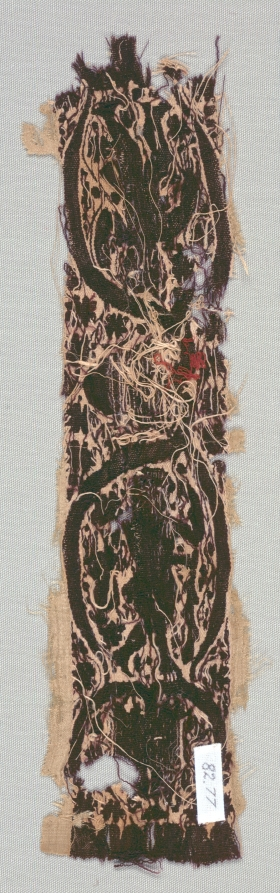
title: Rare Silk Tunic Fragment with Ornamental Sleeve Band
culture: Egypt, Byzantine period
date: 400s-500s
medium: plain weave: silk; tapestry weave with supplementary weft wrapping; undyed linen, dyed wool, silk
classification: Textile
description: This is the only known remnant of a silk tunic among thousands of tapestry-woven decorations that have survived in the dry Egyptian climate. Expensive imported silk, instead of indigenous linen or wool, formed the entire luxurious ground of the tunic, visible along the sides of the fragment. Shiny silk thread also formed some of the details, along with thicker linen thread, on the unusually brilliant purple wool ground. Two males wearing a short garment (chiton) draped over one shoulder appear under vines emanating from baskets. One holds a club with a rabbit beside him; the other bears a staff and a leaf.